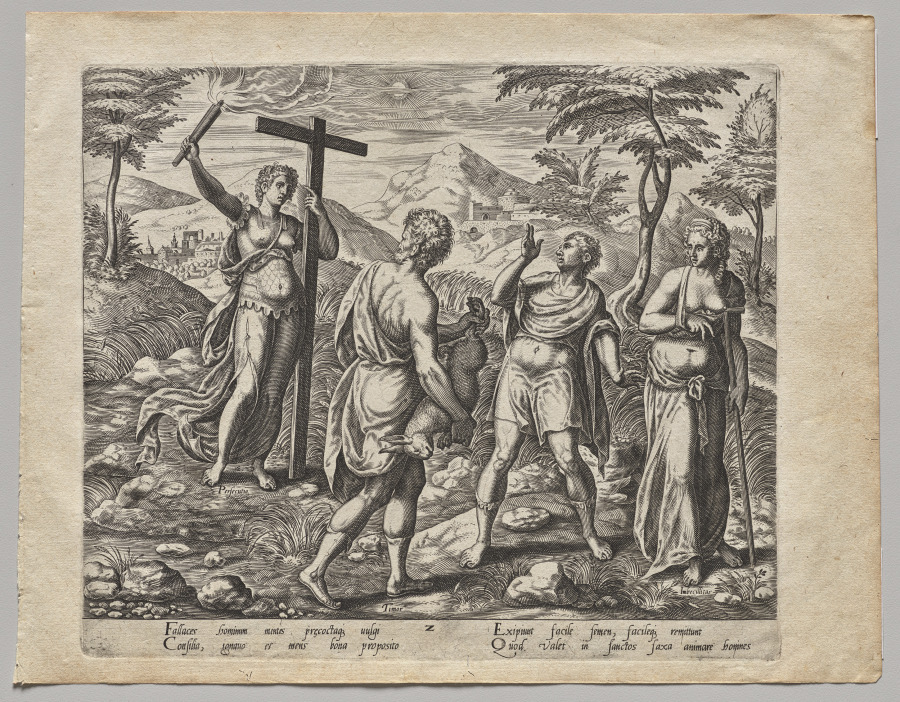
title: The Seed Falling among the Stones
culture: Netherlands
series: Parable of the Sower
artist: Philip Galle (Flemish, 1537–1612)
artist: after Gerard van Groeningen (Flemish)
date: 1574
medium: engraving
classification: Print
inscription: Watermark not identified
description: This is one of a series of four prints portraying the biblical parable of the sower, made in Antwerp (in present-day Belgium) at the end of the 1500s. The parable compares types of soil to people in the world: one hardened; one fickle; one distracted by things of the world; and one with an open heart, ready to accept God. In this image of the fickle sower, the seed cannot grow among the stones because the man turns away when challenged by religion (represented as a standing figure with a cross). He is accompanied by two more figures representing Fear and Weakness.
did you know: The figure representing religion in this image is described specifically as “Persecution,” implying some of the religious troubles during the Protestant Reformation.